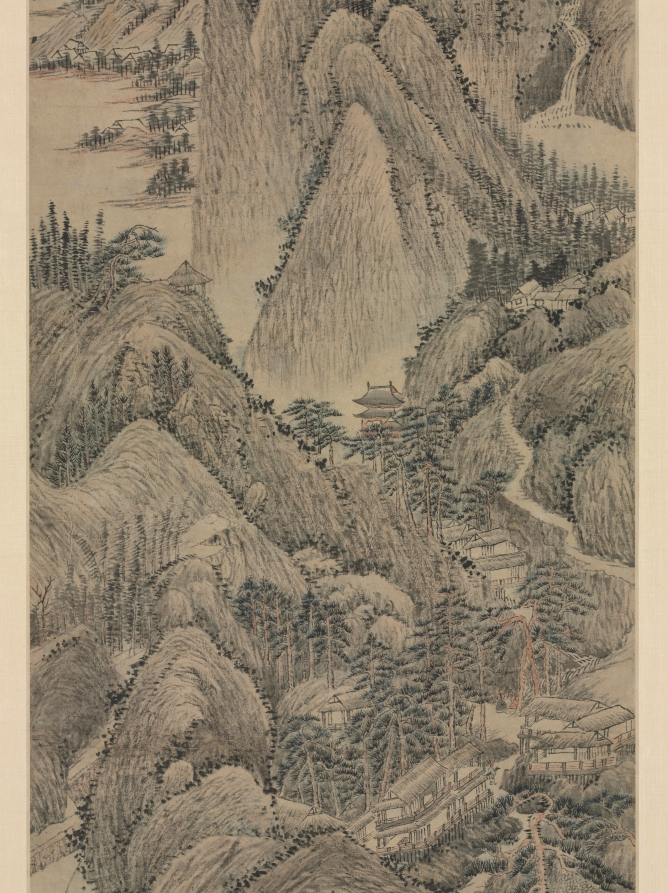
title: Pine Wind from Myriad Villages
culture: China, Qing dynasty (1644-1911)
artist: Wu Li (Chinese, 1632–1718)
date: late 1600s–1718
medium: Hanging scroll; ink and light color on paper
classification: Painting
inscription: Artist's title, signature, and 2 seals: Pine Wind from Myriad Valleys. Mojing daoren Wu Li.[seals] Mojing daoren; Wu Li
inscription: 5 additional seals: 2 of Fang Guancheng 方觀承 (1698–1768); 1 of Ma Chi-tso (1900s); 2 unidentified.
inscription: Two seals of the Qianlong emperor [r. 1736–95], probably authentic, were believed spurious and removed by a previous owner.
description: Wu Li, a native of Jiangsu province, was a talented painter, poet, and calligrapher. He studied painting with Wang Jian (1598–1677) and Wang Shimin (1592–1680), two of the “Four Wangs,” leaders of the Orthodox school of painting in the early Qing period. Through them, he also absorbed styles of earlier Ming dynasty masters. Wu was highly praised by his contemporaries and his paintings were in demand, but his interest in philosophy and religion curtailed his painting activities later in life. Wu Li converted to Christianity and in 1688 was ordained as one of the first 3 Chinese Jesuit priests. He spent the final 30 years of his life primarily in missionary work with the poor. Although this painting is undated, the sooty blackness of the ink tones and the easy self-confidence with which they are set down on paper echo recognized late works.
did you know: A figure carrying a qin, zither, walks between the buildings, perhaps intending to play music for the two men seated beneath the pines.